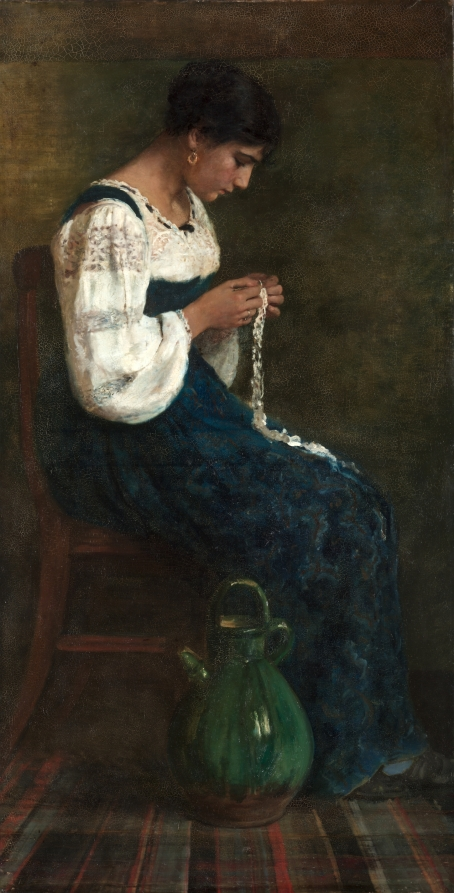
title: Capri Lace Maker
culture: America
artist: George B. Butler (American, 1838–1907)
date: 1884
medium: oil on canvas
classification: Painting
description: George Butler studied with the American artist Thomas Hicks in New York City before going to Paris in 1859 to study with Thomas Couture, whose most famous pupils included Édouard Manet and Puvis de Chavannes. He returned to the United States and served in the Union Army during the Civil War, at which point he lost his right arm. He went to Italy in 1875, where he remained for a number of years. During his stay abroad, Butler painted Capri Lace Maker. Although to a contemporary viewer this work may seem to be a fairly traditional, conservative composition, the bravura of the brushwork and the thick layers of pigment mark the European influence on Butler's style. An accomplished academic painter, Butler was elected to the National Academy of Design in 1873 and exhibited this work there in 1884. A gift of the artist's daughter, Capri Lace Maker was the first painting to enter the museum's collection on February 2, 1915.